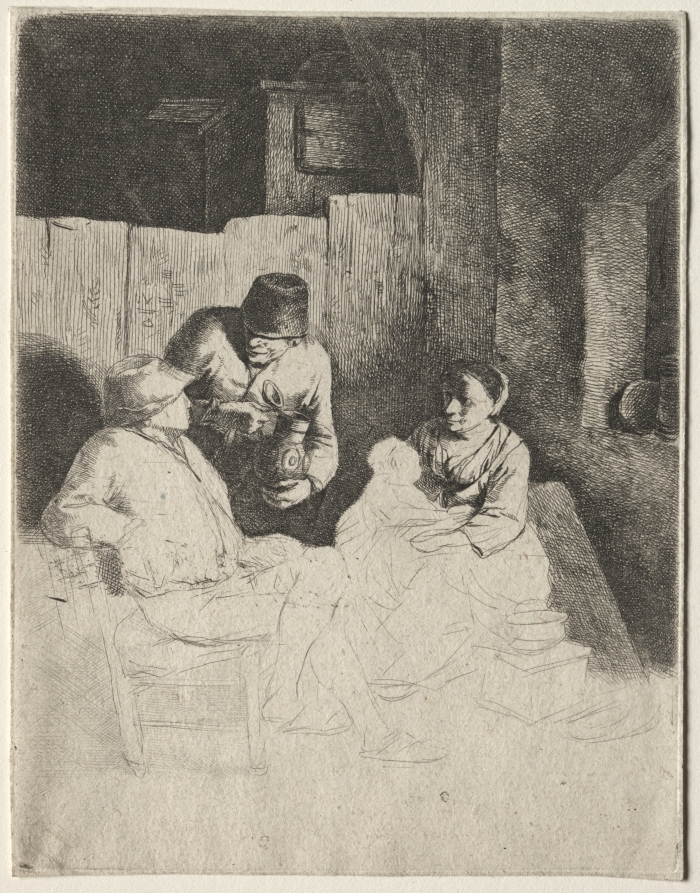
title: The Mother Seated in an Inn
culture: Netherlands, mid 17th century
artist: Cornelis Pietersz Bega (Dutch, 1631/32–1664)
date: 1642–64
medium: etching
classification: Print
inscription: VERSO, center, in graphite: C 2103 / C 14864[crossed out] ; lower left, in graphite: R 304 Y ; lower left, in graphite: B 31[underlined] ; lower center, in pen and brown ink: Bega fecit / mfr. ; lower center, in graphite: H. 4 / M. 7